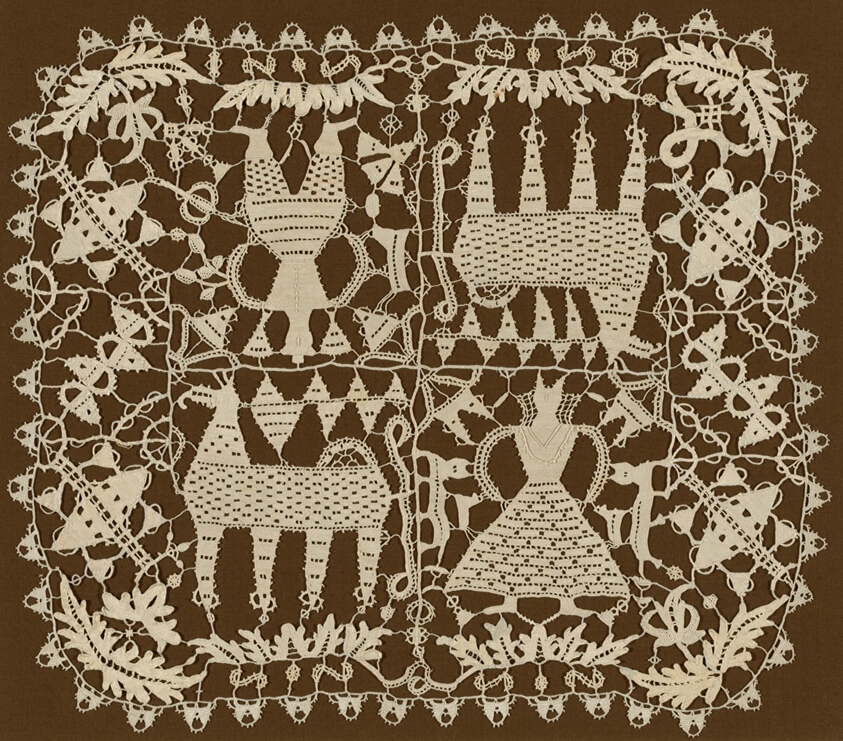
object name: Textile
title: Chalice Cover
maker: Italy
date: Early 17th century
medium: Linen, needle lace worked on a laid thread grid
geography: Italy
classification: textile; lace - needle